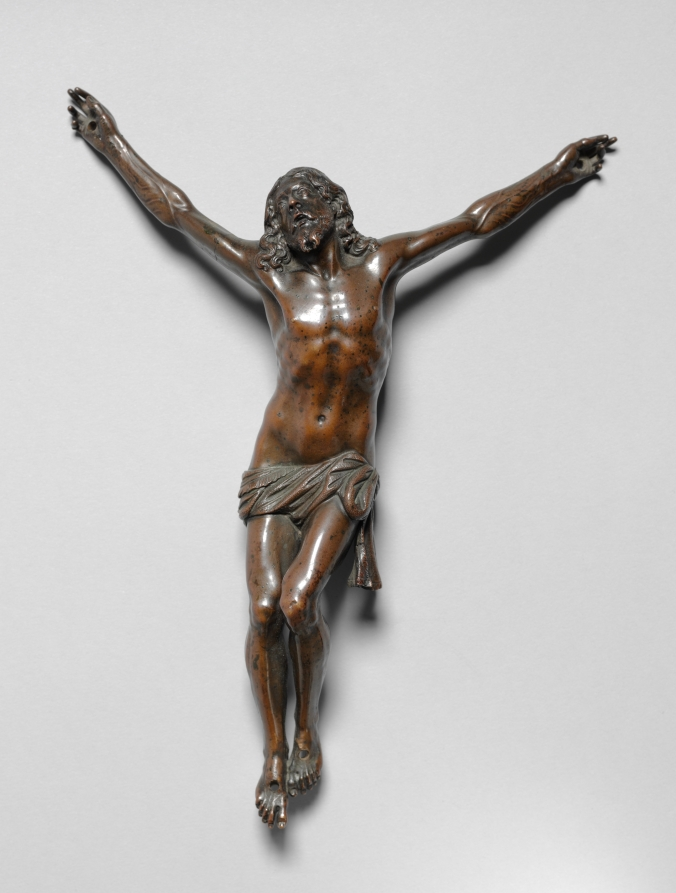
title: Christ Crucified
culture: Italy, Florence(?), 17th century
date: c. 1600–1650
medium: bronze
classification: Sculpture